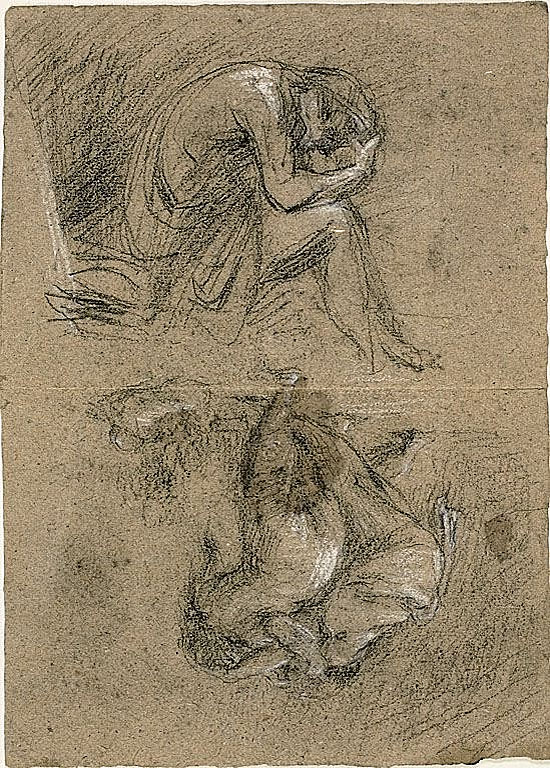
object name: Drawing and Watercolor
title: Sketches: Seated Man with Head in Hands and Two Figures Bending Toward Others in Background (recto); Reclining Woman (verso)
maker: Jean Baptiste Carpeaux (French, 1827-1875)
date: 1847/75 (recto); 1863/64 (verso)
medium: Black and white chalk (recto and verso) on tan wove paper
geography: France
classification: chalk; drawings (visual works); prints and drawing